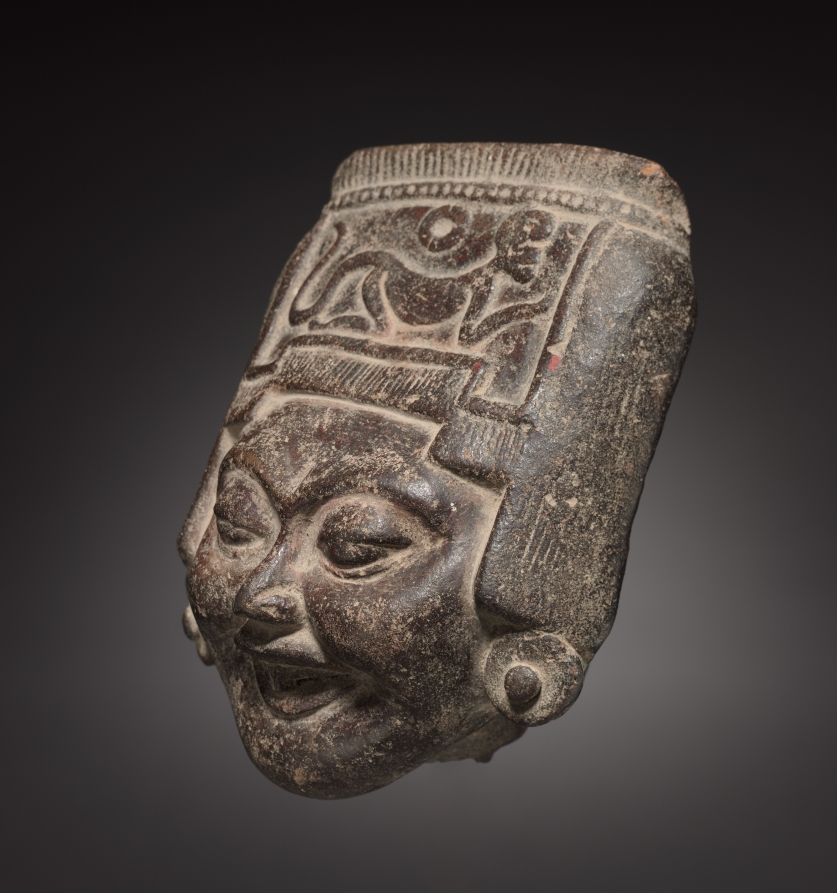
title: Head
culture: Mexico, Classic Veracruz (Remojados Culture)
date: 600–1100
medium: terracotta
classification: Sculpture